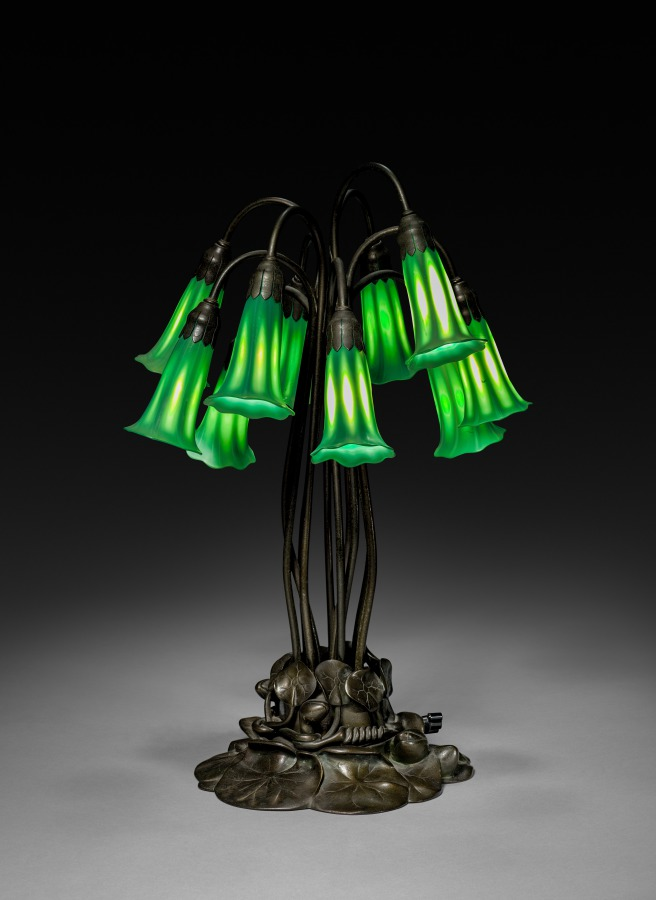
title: Pond Lily Table Lamp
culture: America, New York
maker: Tiffany Studios (United States, New York, 1902–32)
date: c. 1902–10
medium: Favrile glass, bronze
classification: Lamp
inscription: Shades etched: L.C.T.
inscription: stamped on bottom: Tiffany Studios/New York/3(?)8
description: The dawn of the 20th century spurred fresh approaches to design. Louis Comfort Tiffany’s great contribution to this new art movement, termed the Art Nouveau, was not only the shimmering iridescence of his Favrile glass but also the naturalistic compositions of his lamps and windows, which brought him commercial and critical success in both Europe and America. Symbolic themes, such as this lamp's dark blooms of the pond lily in a swampy landscape, became a hallmark of Tiffany's Art Nouveau design. It won a grand prize for Tiffany Studios at the 1902 international exposition in Turin, Italy.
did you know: The dawn of electricity made this lamp possible, transforming a work of sculpture into a useful object.